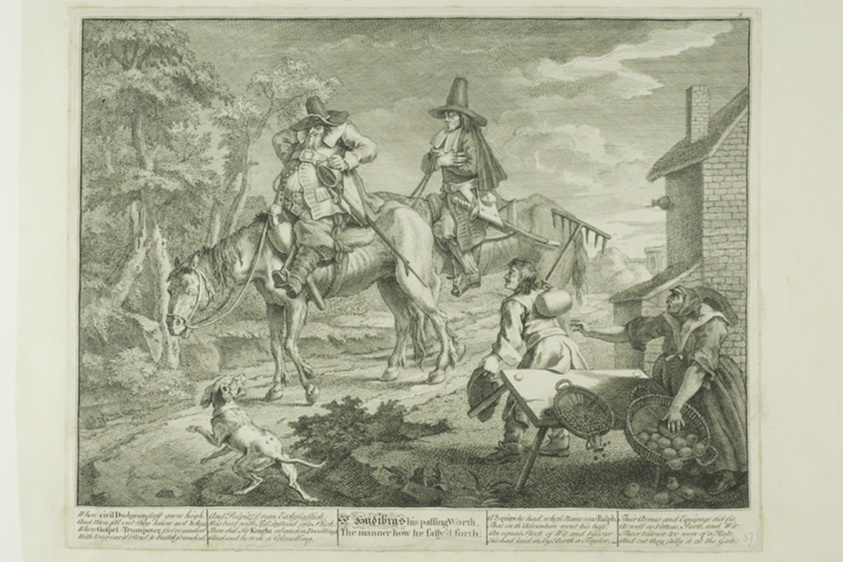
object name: Print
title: Hudibras Sallying Forth, plate two from Hudibras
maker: William Hogarth (English, 1697-1764)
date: February 1725/26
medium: Etching and engraving in black on cream paper edge mounted on cream wove paper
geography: England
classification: engraving; prints and drawing; print; etching